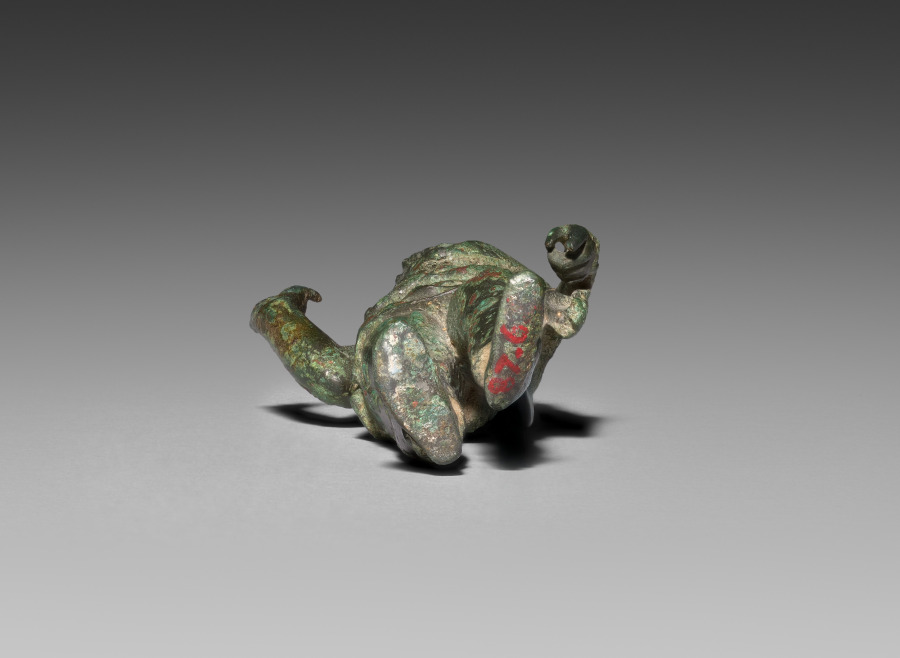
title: Barbarian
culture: Italy, Rome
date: 1–100 CE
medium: bronze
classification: Sculpture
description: This bearded figure wears a tunic, trousers, and a soft conical hat with the apex bent over, called a Phrygian cap. He stands with his right hand raised (missing the index and little finger) and his left leg slightly bent. The figure originally held an implement in his lowered left hand, whose fingers curve around a shaft. The garments and cap identify him as a foreigner, likely a Dacian. Emperor Trajan (reigned AD 98–117) fought two military campaigns against Dacia (modern-day Romania), where he conquered and annexed the southern half of the region.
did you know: This figure may have decorated an ornate parade breastplate on a horse.